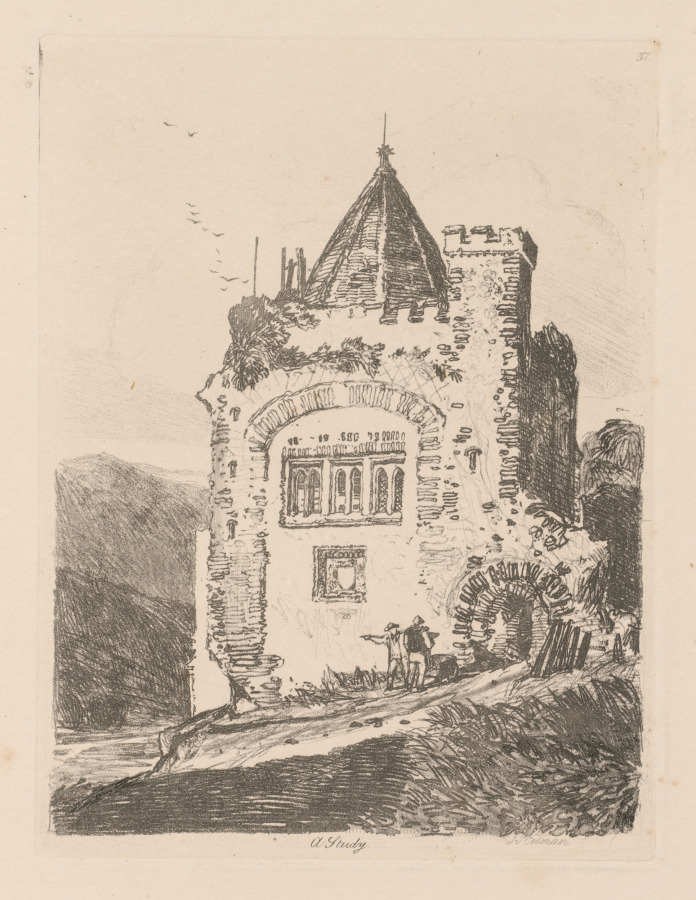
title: Liber Studiorum: Plate 37, A Study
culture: England, 19th century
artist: John Sell Cotman (British, 1782–1842)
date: 1838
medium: softground etching, from a bound volume containing 48 plates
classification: Bound Volume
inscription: In plate, within image, upper right: 37; in plate, below image: A Study J S Cotman